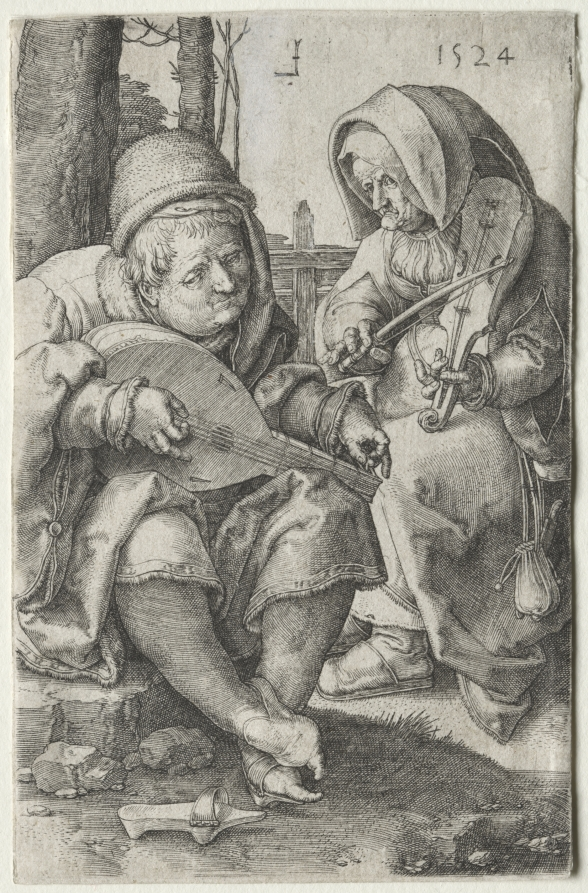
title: The Musicians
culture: Netherlands, 16th century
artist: Lucas van Leyden (Netherlandish, 1494–about 1533)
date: 1524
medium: engraving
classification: Print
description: A man tunes a lute with great concentration, plucking a single string with one hand and turning the tuning peg with the other. Close by, a woman bows a three-stringed rebec--an instrument tuned in fifths like a violin, usually used to play dance music. The costly braiding decorating the man’s coat, and his tight-fitting stockings and pointed wooden sandals suggest the clothing of the courtly class at end of the 15th century. The engraving has been interpreted as depicting marital harmony and longstanding fidelity.